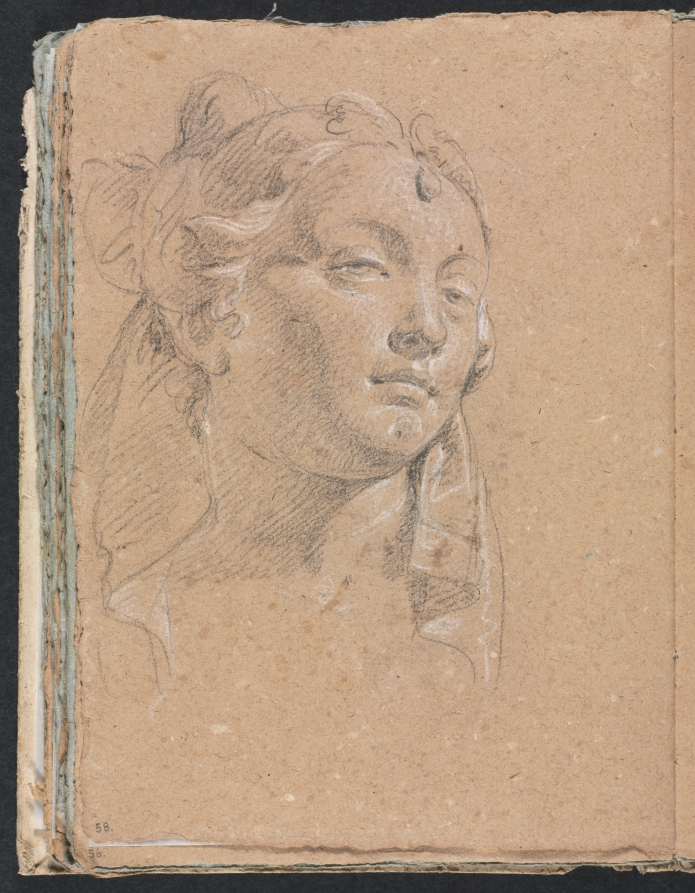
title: Verona Sketchbook: Head of a woman (page 58)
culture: Italy, 18th century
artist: Francesco Lorenzi (Italian, 1723–1787)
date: 1760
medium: black chalk with white heightening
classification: Bound Volume